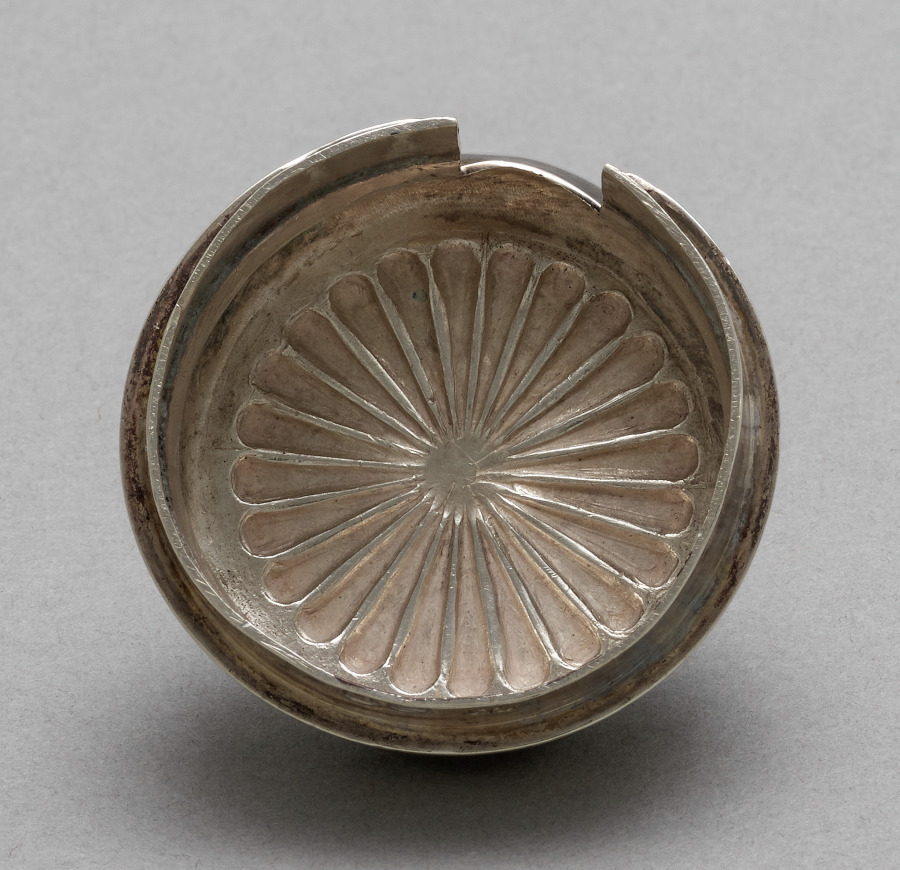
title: Pot (cover) (1 of 2)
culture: England, 19th century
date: 1817–18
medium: silver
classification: Silver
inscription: Stamped on lid: "PS, Lion Passant, "b".